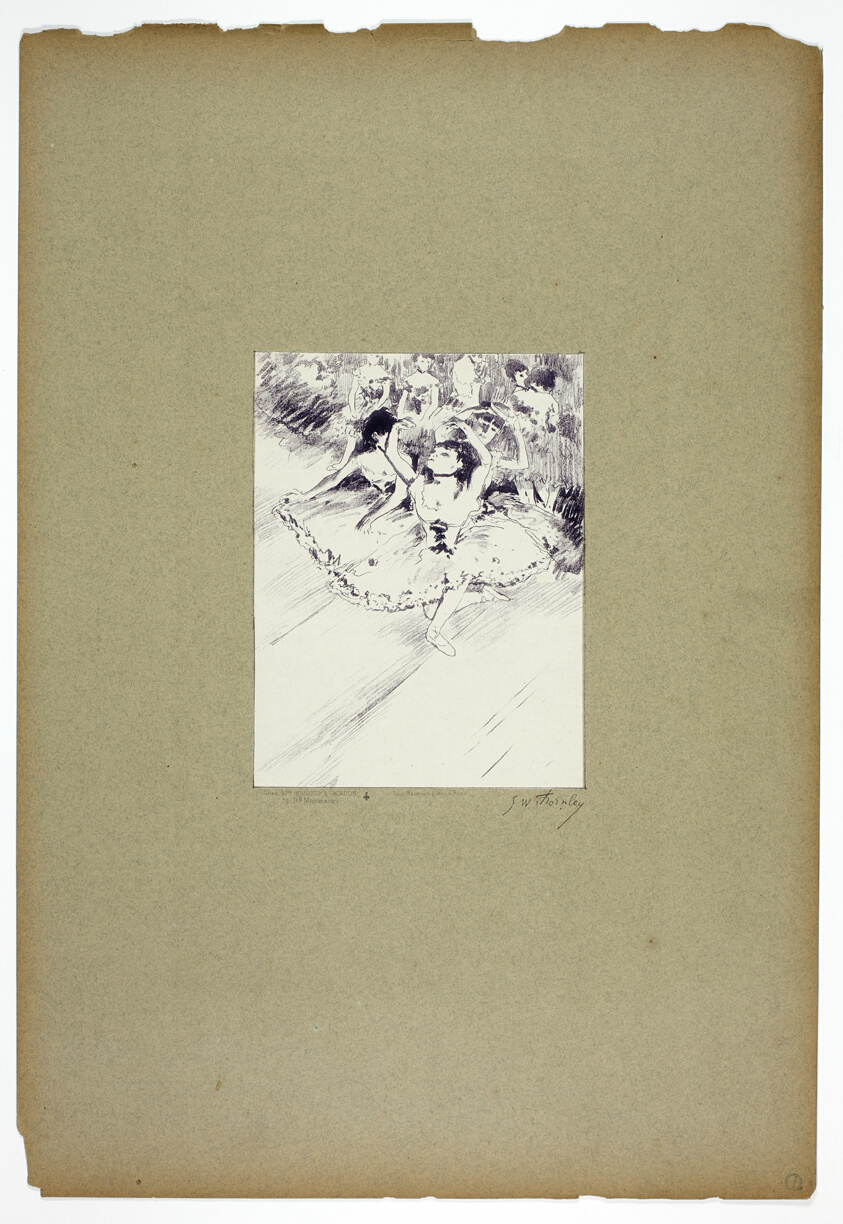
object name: Print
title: Ballet Practice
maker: Georges-William Thornley (French, 1857-1935); after Edgar Degas (French, 1834-1917); printed by Atelier Becquet (French, 19th century); published by Boussod, Valadon, & Company (French, 18th-19th century)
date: 1889–90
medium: Lithograph in purple on paper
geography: France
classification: lithograph; print; prints and drawing